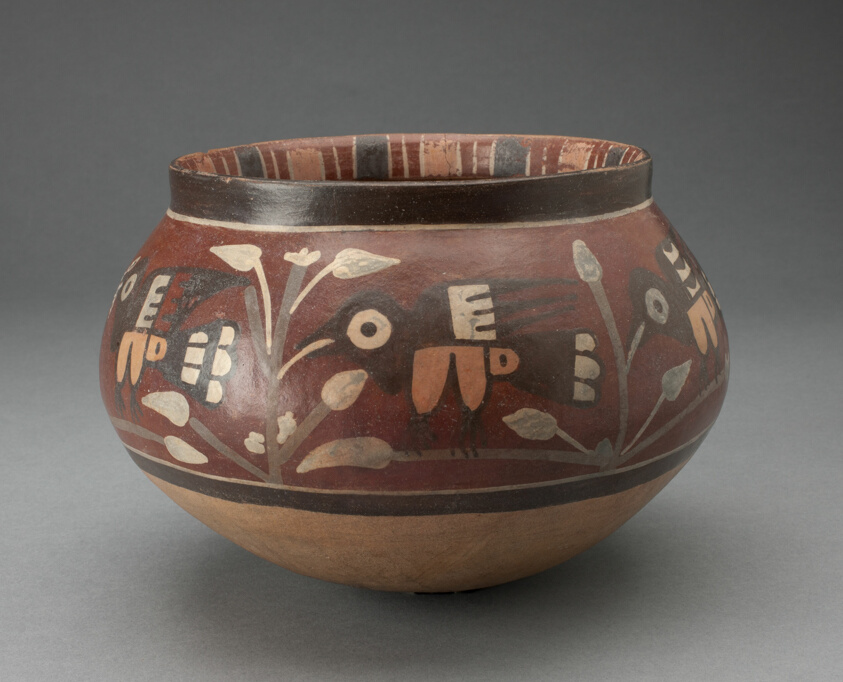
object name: Vessel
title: Bowl Depicting Birds and Flowers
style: nazca, early intermediate period, Pre-Columbian, americas, Arts of the Americas, andean, andes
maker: Nazca; South coast, Peru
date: 180 BCE–500 CE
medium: Ceramic and pigment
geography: Peru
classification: bowl; earthenware; art of the americas; ceramics; vessel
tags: super/natural